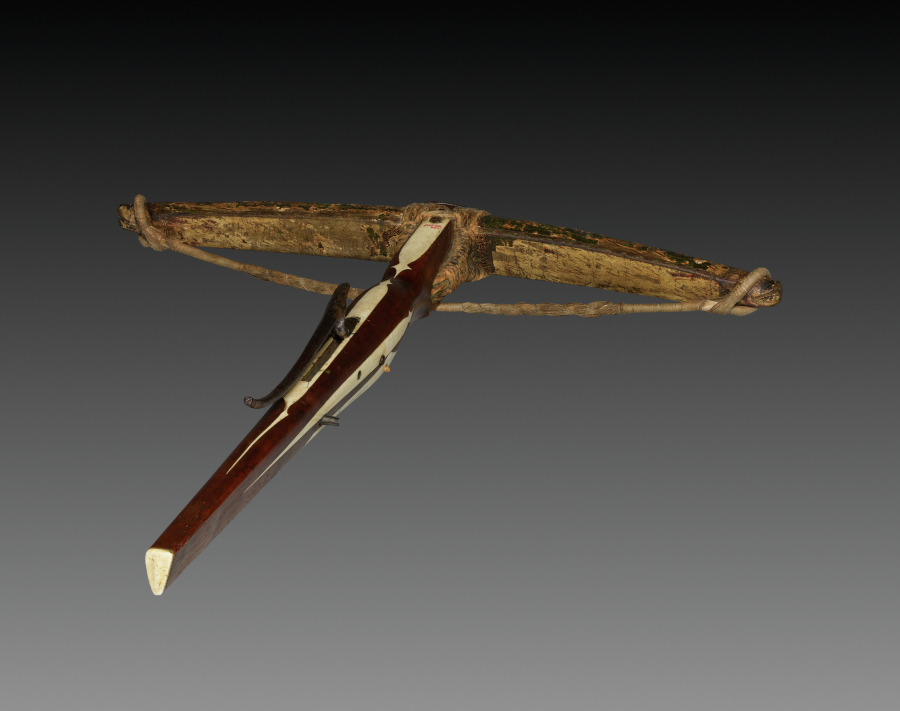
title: Crossbow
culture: Germany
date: c. 1460–70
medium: wood (walnut?) inlaid with bone; horn; iron and steel; composite bow (horn and parchment)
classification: Arms and Armor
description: The cranequin, or winding device sitting on top of the crossbow, made it easier to span for reloading. With a full quiver, a container for bolts and arrows, a hunter could bring home plenty of meat.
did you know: In every army in Europe crossbowmen were considered an elite corps, and as such occupied the central position in battle formations.